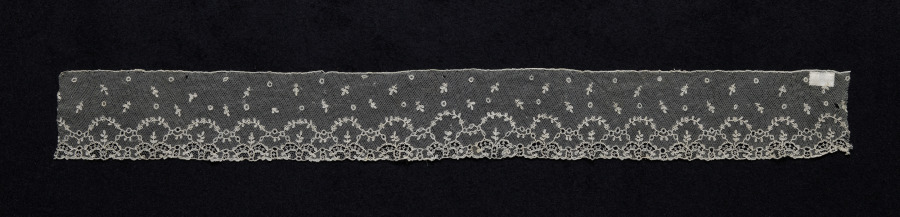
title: Lace Edging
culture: Belgium, Brussels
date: 1780–1899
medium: Linen: bobbin lace net with needle lace appliqué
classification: Lace